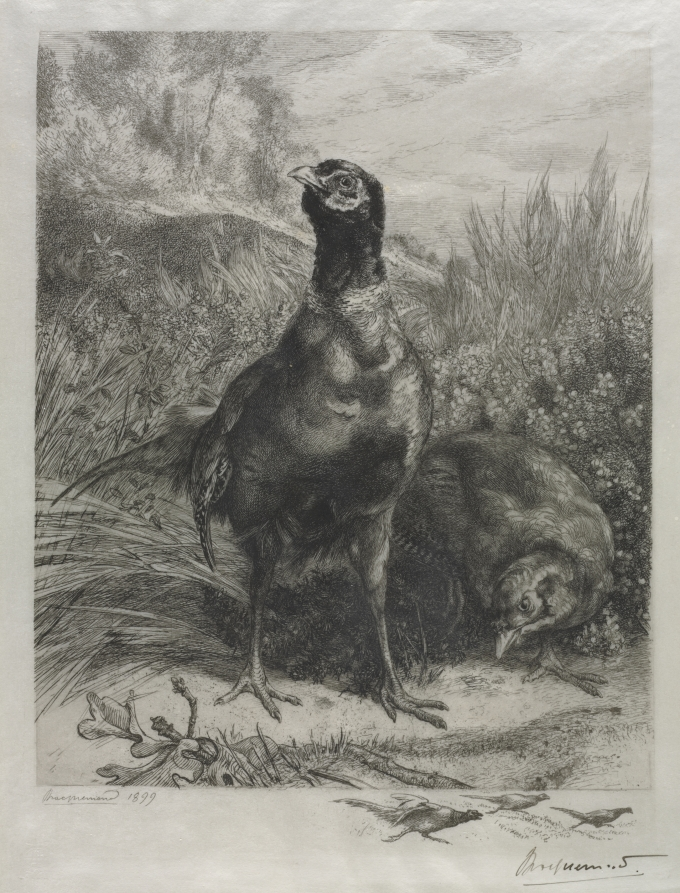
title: The Pheasants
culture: France, 19th century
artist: Félix Bracquemond (French, 1833–1914)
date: 1899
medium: etching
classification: Print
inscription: signed lower right margin, in black ink: Bracquemond; printed: Bracquemond 1899